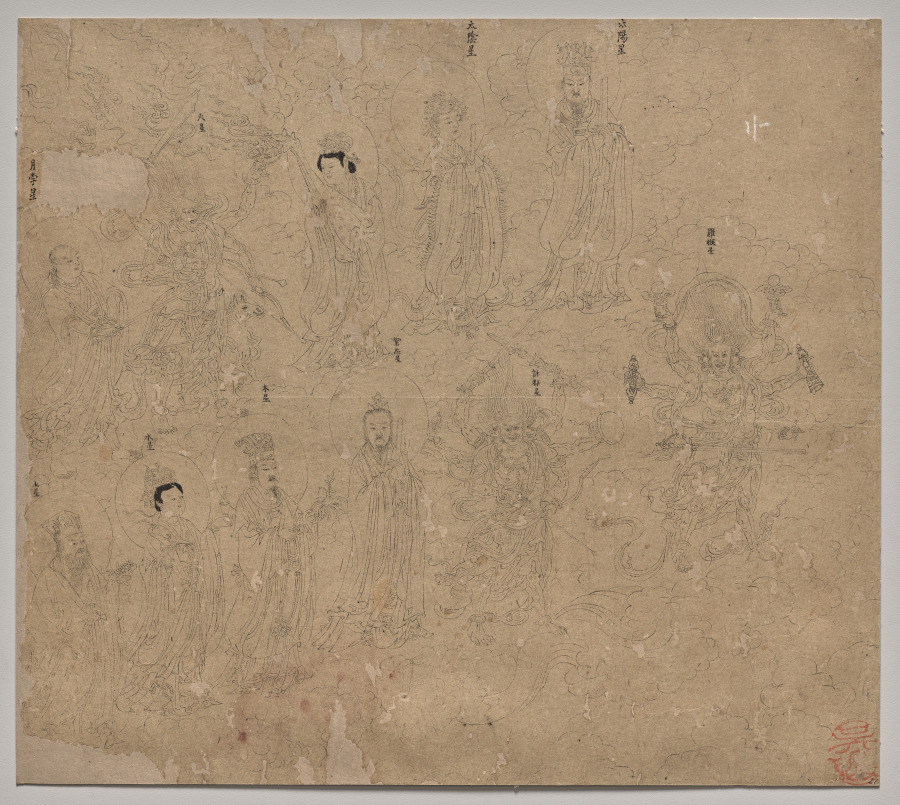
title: Album of Daoist and Buddhist Themes: Procession of Daoist Deities: Leaf 21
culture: China, Southern Song dynasty (1127-1279)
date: 1200s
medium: album, ink on paper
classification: Painting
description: This leaf is part of an important album of 50 drawings encompassing three subjects: processions of Daoist deities to the celestial spheres, the Ten Kings of Hell, and Erlang’s Campaign to Rid Mount Guankou of Dangerous Beasts (soushan tu 搜山圖). This leaf belongs to a group of drawings of deities of the Daoist pantheon that inspired Chinese Buddhist iconography in many instances. Here we see the personified Nine Brilliant Constellations (Jiu yao 九曜). From right to left in the upper row are the sun and moon followed by three other stars: Venus as a goddess, Mars, and Yuebei. Proceeding in the lower row from right to left are Luohou, the comet Jidu, Ziqu, Jupiter, Mercury depicted as a female, and Saturn.